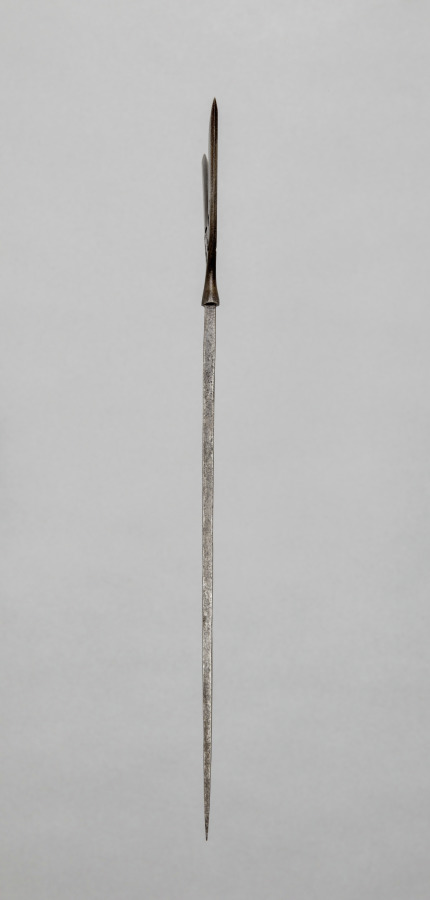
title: Arrow Head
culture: Japan, Edo period (1615–1868)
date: 1600s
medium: iron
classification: Arms and Armor